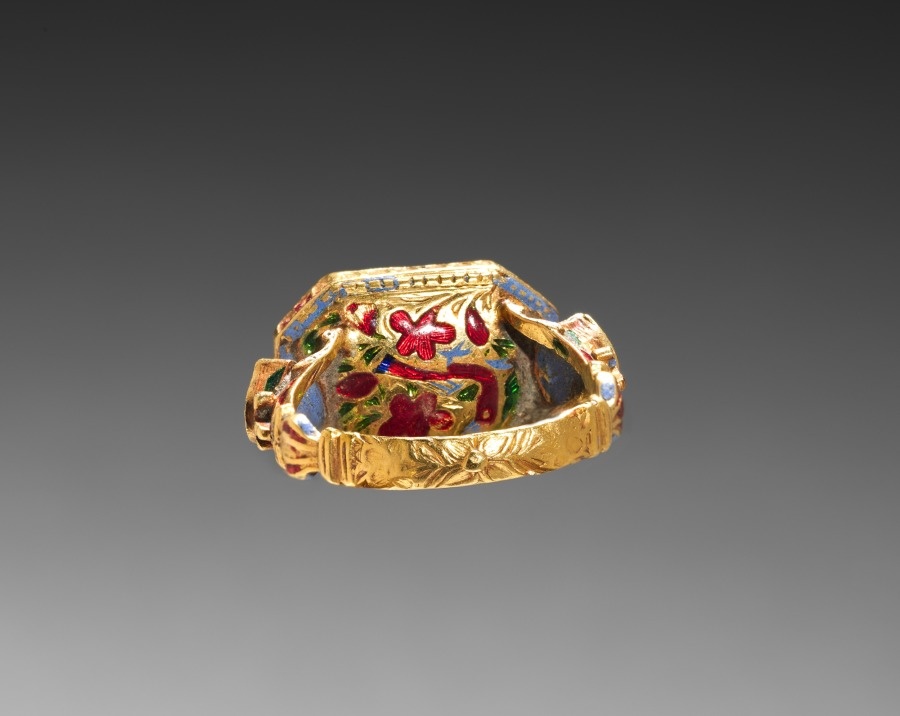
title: Ring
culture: India, Mughal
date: 1700s-1800s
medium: Gold, emerald, glass, silver foil, and enamel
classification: Jewelry